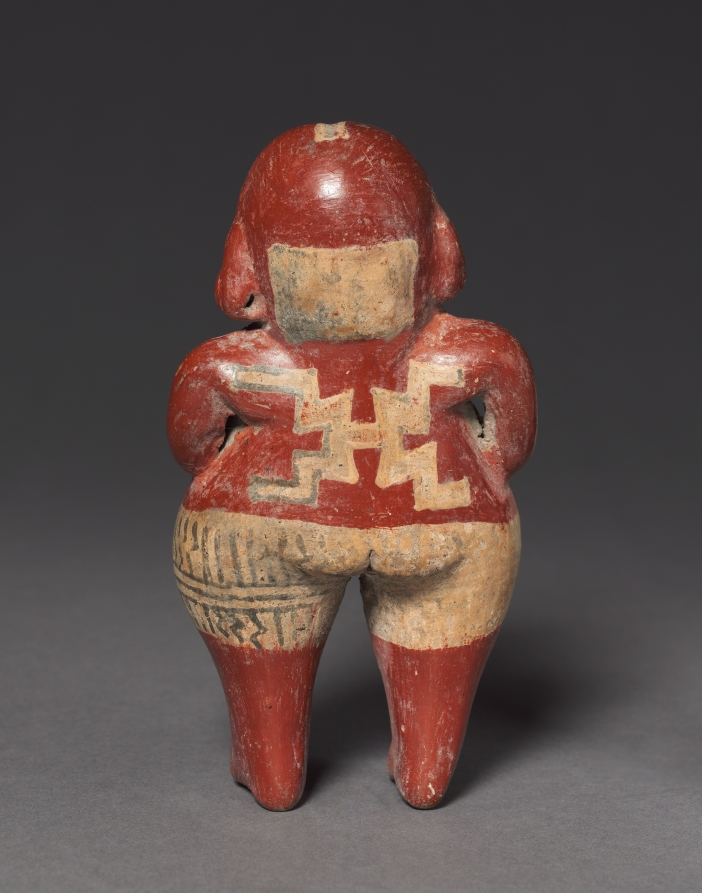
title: Geometrically Patterned Female Figure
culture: Mesoamerica, Guanajuato or Michoacán, Chupícuaro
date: 400–100 BCE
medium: Ceramic, slip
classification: Sculpture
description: Artists of the Chupícuaro culture, based to the north of modern-day Mexico City, may be best known for hollow ceramic figurines like this one. Always female and often apparently pregnant, such figurines commonly are painted with stepped geometric motifs in vibrant, highly burnished slips (creamy mixtures of water and crushed minerals). The meanings of the motifs and the figurines themselves are poorly understood.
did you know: This figure was formed in two halves that were hollowed out and joined at the hips.